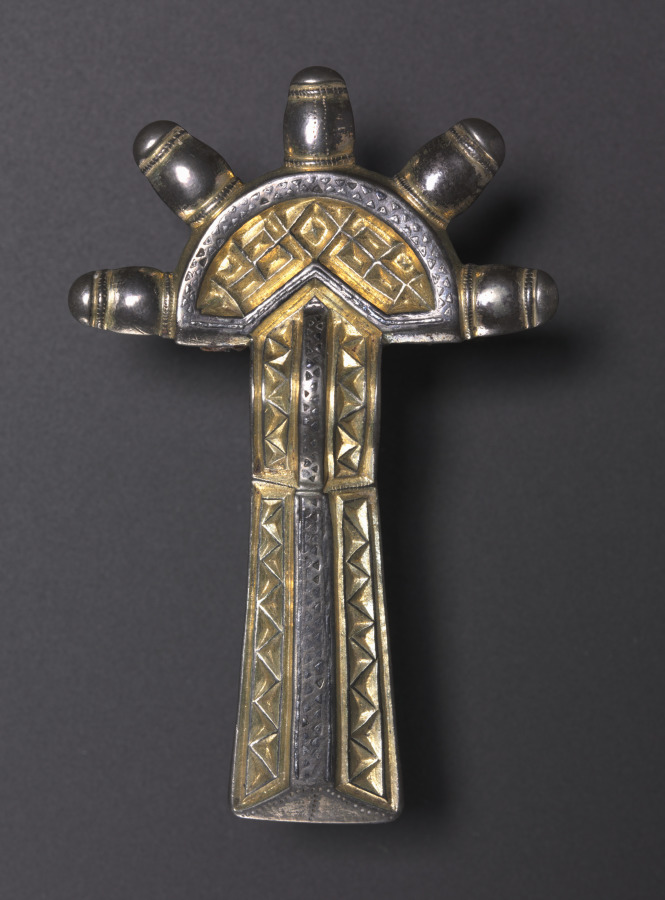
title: Bow Fibula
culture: Alemannic, 6th century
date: 500–550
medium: silver gilt and niello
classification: Jewelry